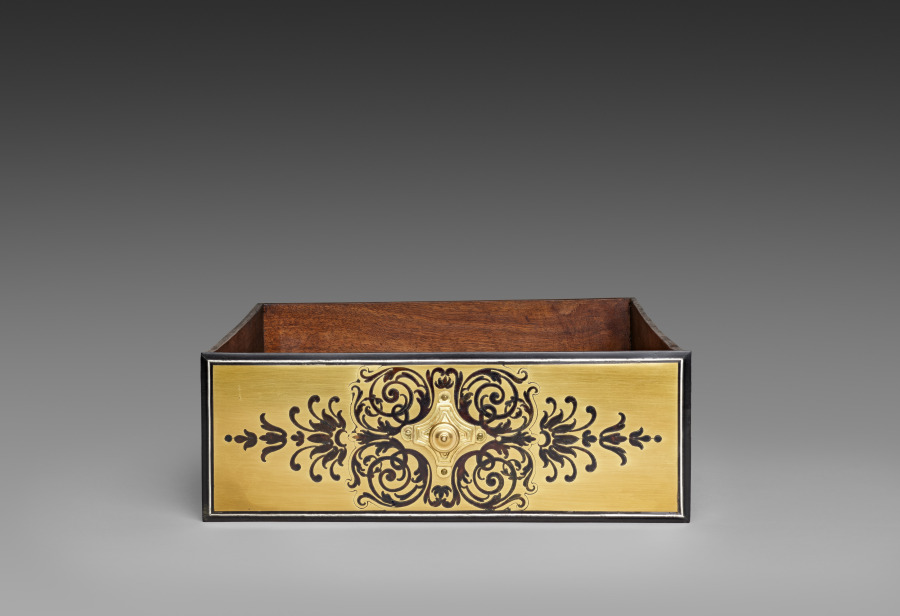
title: Interior Drawer for Cabinet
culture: France, late 17th Century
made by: André-Charles Boulle (French, 1642–1732)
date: c. 1690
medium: ebony, marquetry in metal and tortoiseshell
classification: Furniture and woodwork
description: Appointed cabinetmaker to King Louis XIV in 1672, André-Charles Boulle became a master of furniture making in France during the late 1600s until his death in 1732. Known primarily for his use of marquetry, in which metal patterns are inlaid into tortoiseshell then applied within the veneered surface of the furniture, Boulle established a level of quality and craftsmanship few others could achieve. As a result, his work found favor at the royal court and among other aristocrats and diplomats eager to impress the king. The inclusion of a medallion depicting Louis XIV within the bronze decoration of this chest would have identified the owner with the royal court. Often exhibiting stout architectural proportions with elegant groups of inlaid motifs such as the parrot on the central panel of this chest, Boulle’s designs are an example of the intellectual fashion for contrasting ideas, materials, and motifs.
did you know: Originally designed to sit atop an elaborate tall stand, this chest was likely altered in the late 1700s to reduce its scale and height.